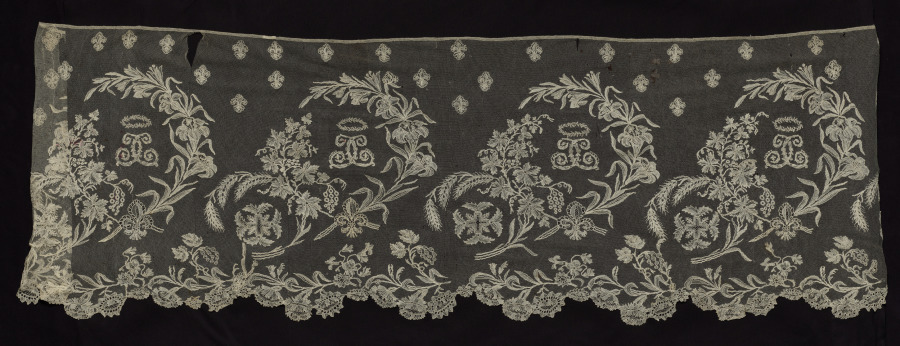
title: Lace Flounce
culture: Belgium, Brussels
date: 1811–99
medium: Machine-made net lace ground with needle lace (point a l'aiguille) appliqué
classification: Lace